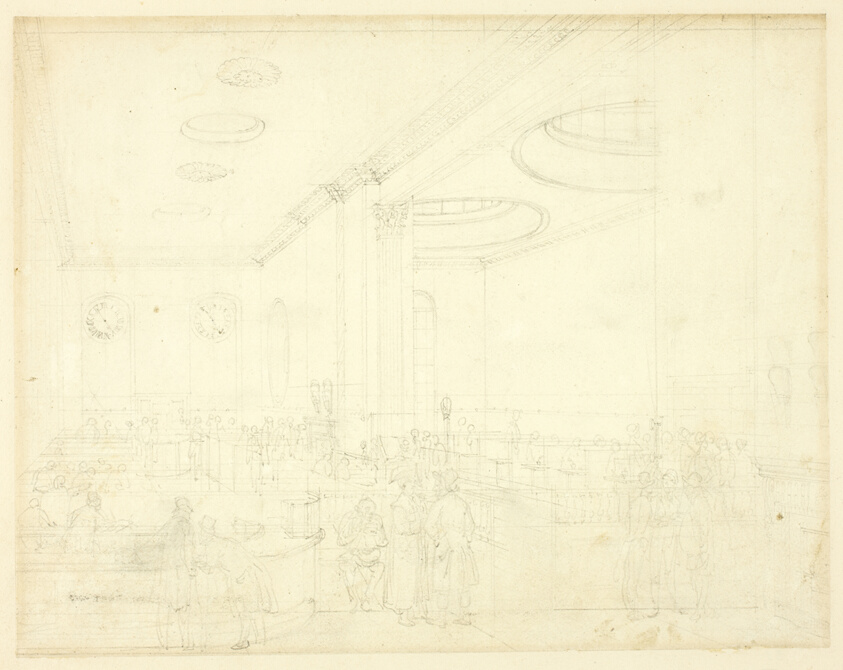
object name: Drawing and Watercolor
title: Study for Lloyd's Subscription Room, from Microcosm of London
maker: Augustus Charles Pugin (English, born France, 1762-1832); Thomas Rowlandson (English, 1756-1827)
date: c. 1809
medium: Graphite on cream wove paper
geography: England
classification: graphite; drawings (visual works); prints and drawing